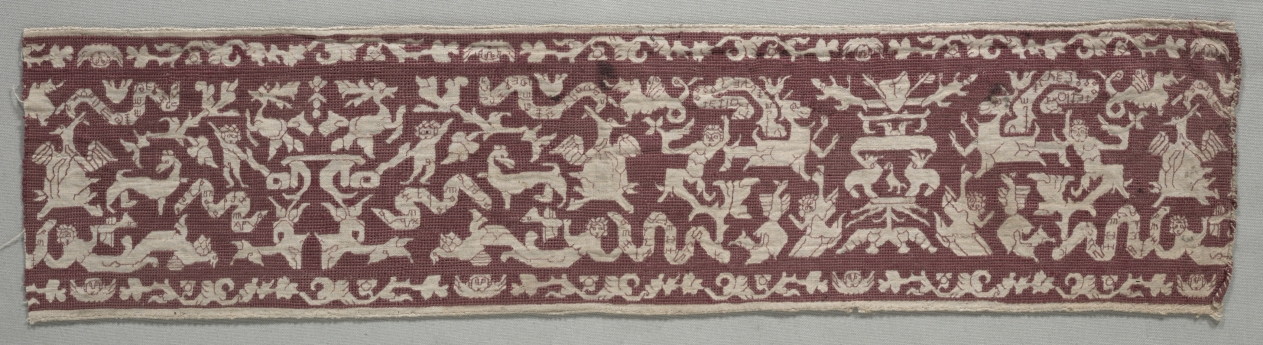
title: Embroidered Strip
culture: Italy, 16th century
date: 1500s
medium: embroidery; silk on linen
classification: Embroidery